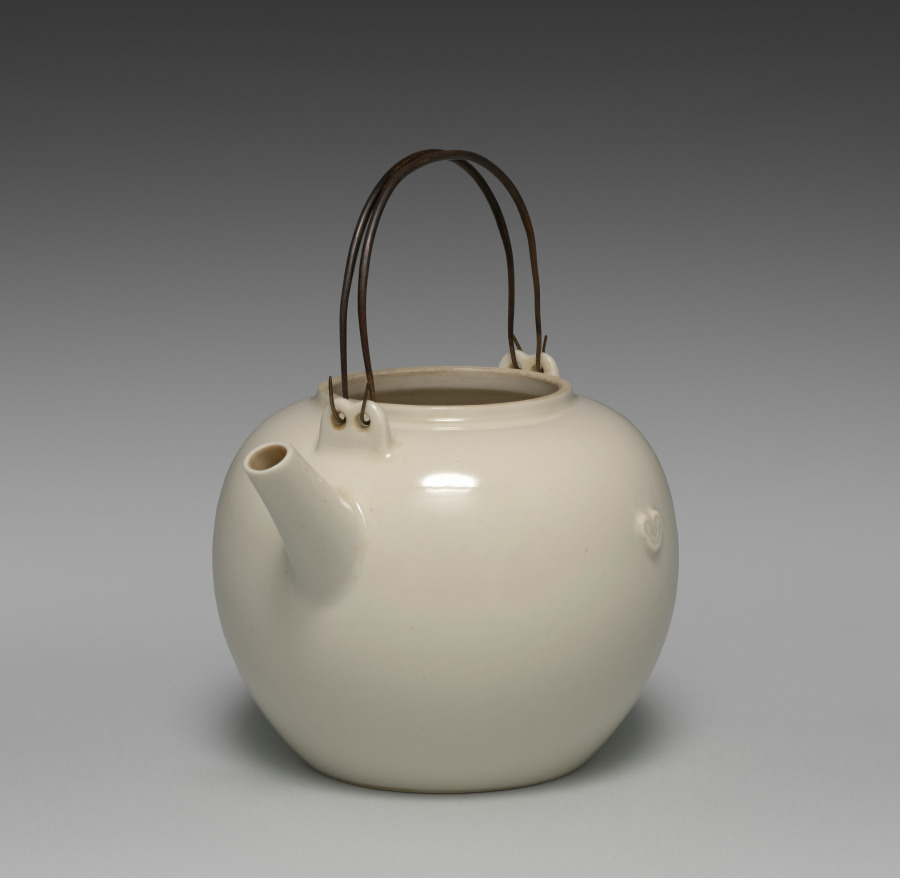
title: Teapot with Ruyi Motifs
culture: Japan, Meiji period (1868–1912)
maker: Seifū Yohei III (Japanese, 1851–1914)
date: 1893–1914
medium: Porcelain with molded design and iron handles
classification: Ceramic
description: The simple, round form of this teapot is embellished with only a pair of nyoi staff-head motifs, one on each side. Two arched iron handles, parallel to each other, are hooked through holes in raised tabs at the front and back of the shoulders of the pot. The round lid is depressed so that an iron ring handle fastened with an iron clamp passing through the lid can lie flat inside the recessed area. The box is not original to the piece and has an inscription dated to 1960. The person who wrote it clearly admired Yohei III and his efforts to produce works that resembled Chinese ceramics. The inscription describes Yohei’s journey to perfecting these copies but misidentified the Chinese kiln whose wares were the basis for this particular work.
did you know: The base of the pot has a “Seifu” seal.